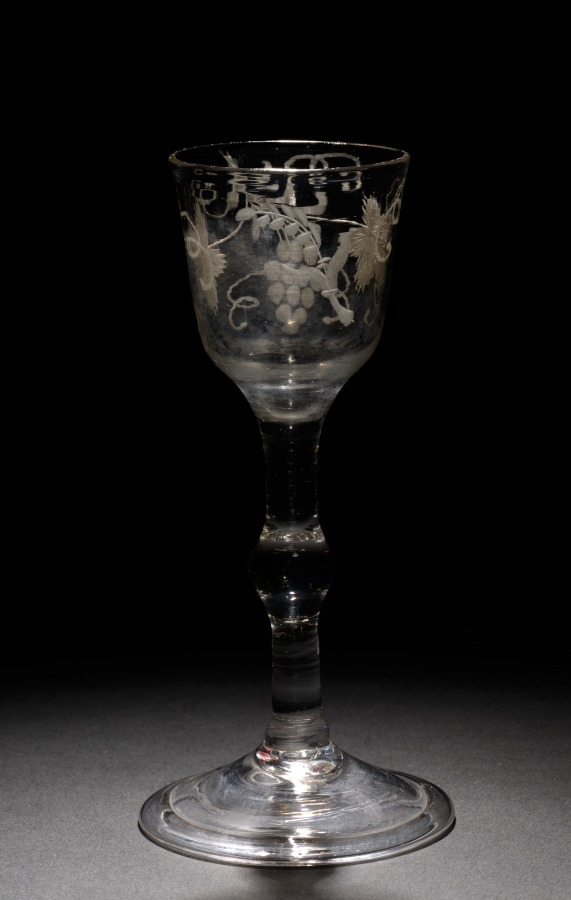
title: Wine Glass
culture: England, 18th century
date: c. 1775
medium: glass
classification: Glass